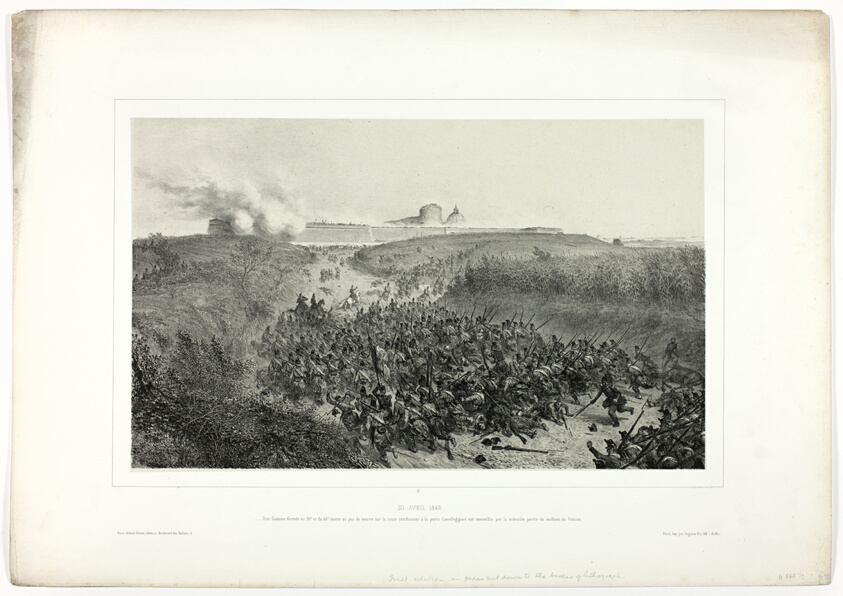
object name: Print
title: April 30, 1849, from Souvenirs d’Italie: Expédition de Rome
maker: Denis Auguste Marie Raffet (French, 1804-1860); printed by Auguste Bry (French, 19th century); published by Chez Gihaut Frères (French, 19th century)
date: 1850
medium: Lithograph in black on buff wove chine laid down on ivory wove paper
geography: France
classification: lithograph; print; prints and drawing